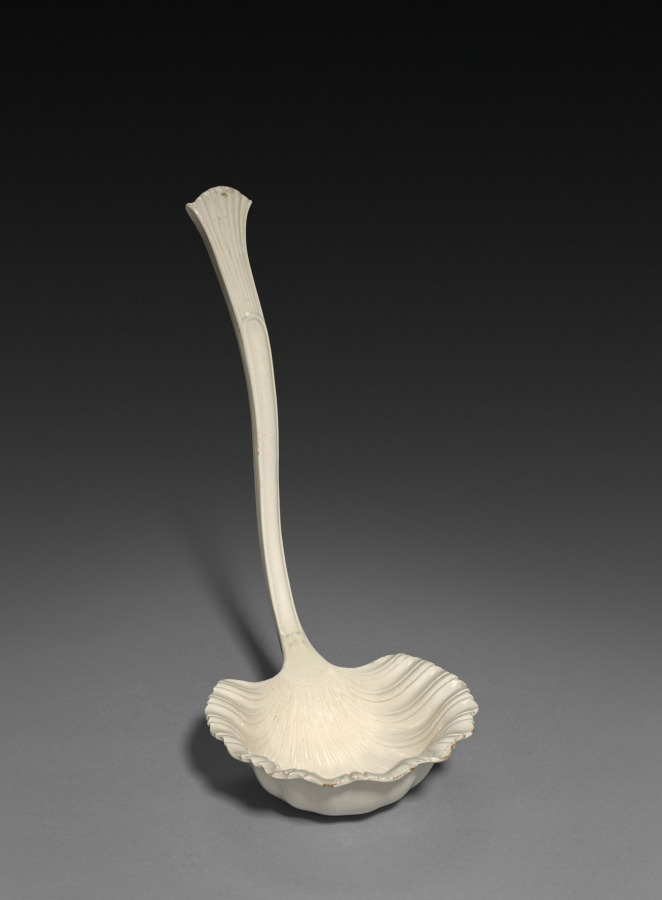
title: Ladle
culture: France, Pont-aux-Chous, 18th century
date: 1750–1775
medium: faience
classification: Ceramic